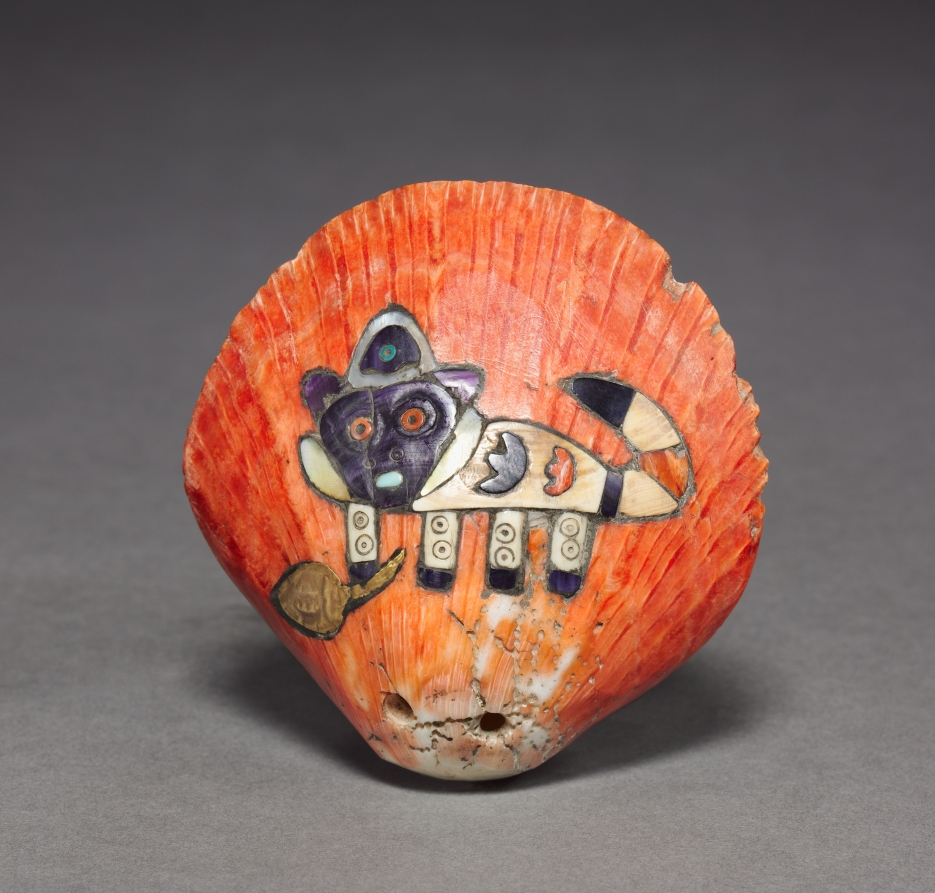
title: Shell with Inlaid Feline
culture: Peru, South Coast, Nasca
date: 100 BCE–700 CE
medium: Spondylus shell with shell, stone, and gold inlay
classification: Jewelry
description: This ornament is made of a spondylus shell, from which the exterior surface has been carved away to reveal a layer of bright orange. The pampas cat inlaid on the surface in multicolored shell and stone has bean-shaped spots on his body, and grasps a gold gourd or fruit. In both Paracas and Nasca art, the small, non-domesticated pampas cat is strongly associated with beans and other crops. Perhaps it was thought to guard the fields from rodents and other pests.